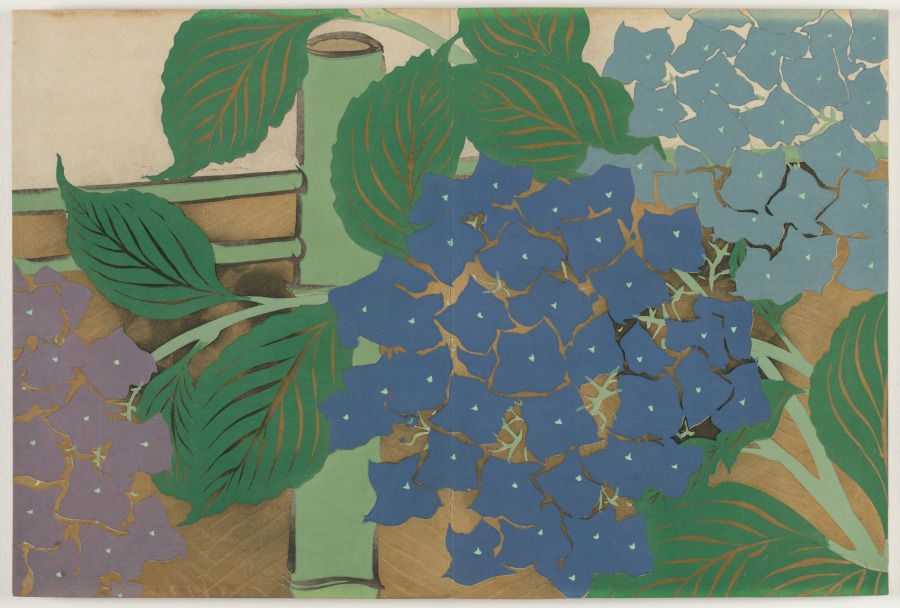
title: Flowers of a Hundred Worlds (Momoyogusa): Hydrangea (Ajisai)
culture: Japan, Meiji period (1868–1912)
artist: Kamisaka Sekka (Japanese, 1866–1942)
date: 1909–10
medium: color woodcuts with gold and silver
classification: Bound Volume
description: This print from a set of three woodblock printed albums displays the graphic design prowess of Kamisaka Sekka. The images were first distributed one by one to subscribers to the series but later were reissued in bound form, like this book, for mass consumers. Each print features a vignette taken from nature or Japanese literature. Many of the scenes have a long history in Japan, originating in the 900s or 1000s and having been interpreted by all manner of artists since that time. Sekka’s selections hew closely to precedents from the Rinpa style originated by painter Tawaraya Sōtatsu (c. 1570–c. 1640) and calligrapher Hon’ami Kōetsu (1558–1637).